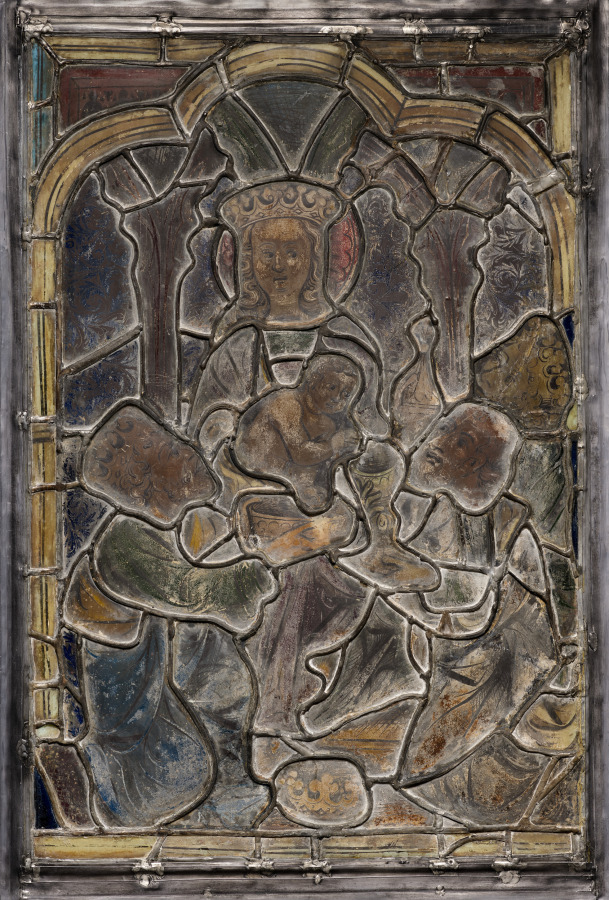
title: The Adoration of the Magi from the Parish Church of Maria am Waasen in Leoben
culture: Austria, Styria, 15th century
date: c. 1410–20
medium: stained glass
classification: Glass